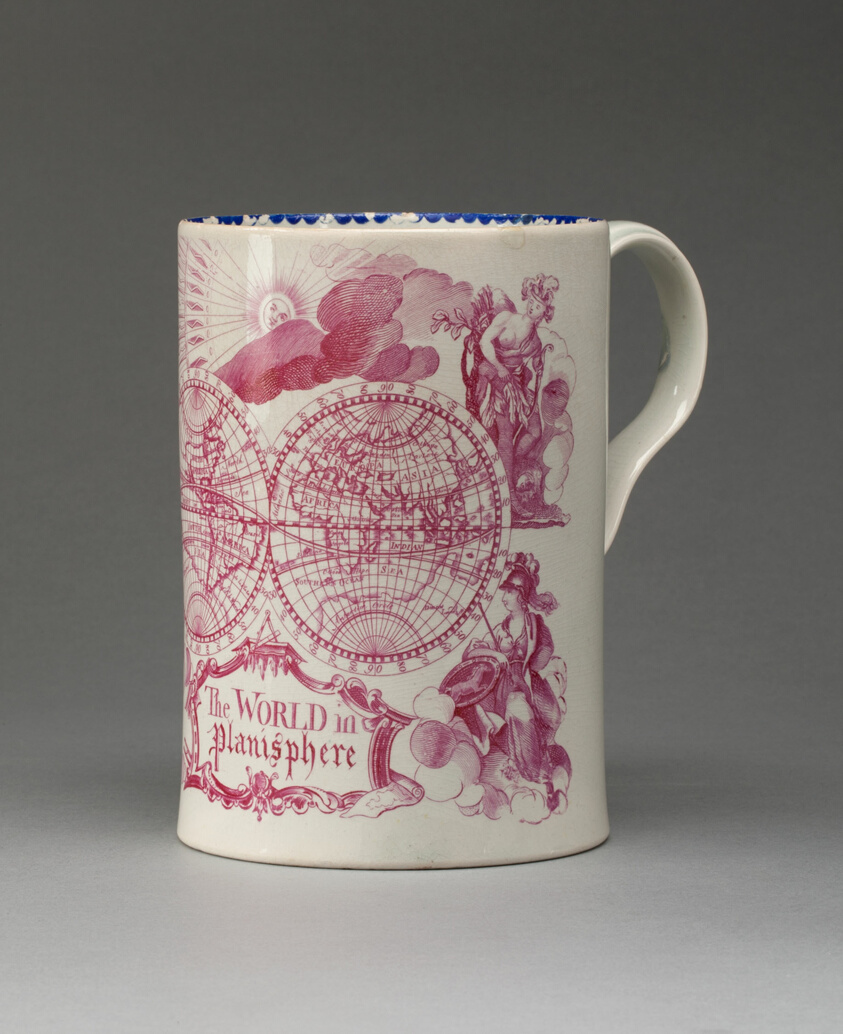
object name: Ceramics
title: Tankard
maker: Possibly Bristol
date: c. 1780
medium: Tin-glazed earthenware (pearlware), puce transfer-printed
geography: Bristol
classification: drinking vessel; tin-glazed ware; pearlware; european decorative arts; earthenware; ceramics